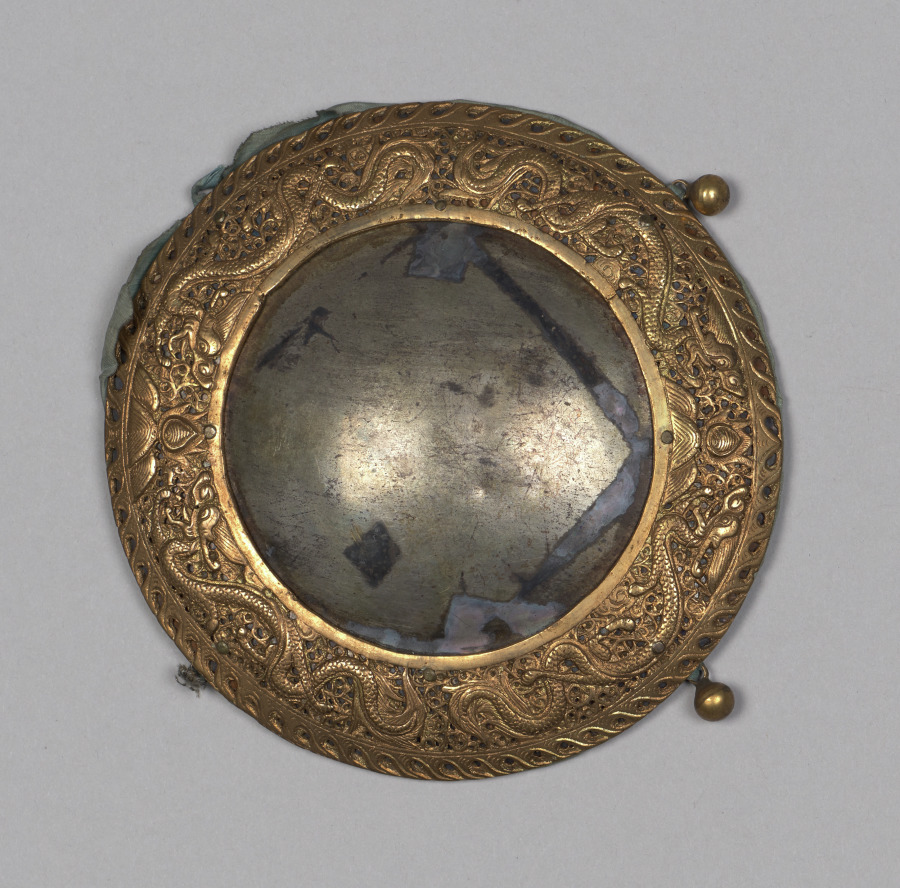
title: Ceremonial Uniform: Back Metal Plate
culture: China, Qing dynasty (1644-1911)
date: 1644–1911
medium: metal (brass?); lined in blue silk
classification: Arms and Armor